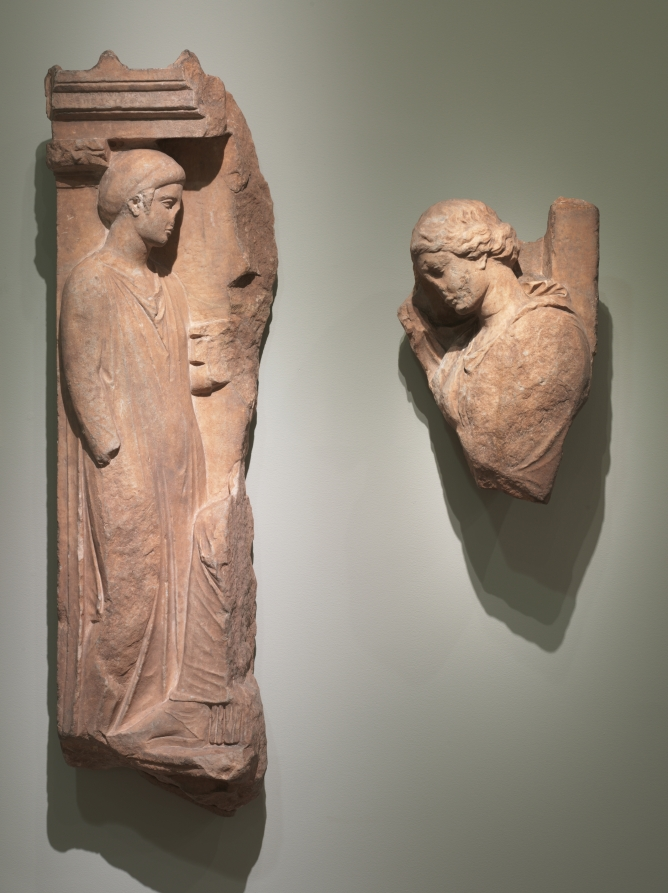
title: Grave Stele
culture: Greece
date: 400–350 BCE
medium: pentelic marble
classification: Sculpture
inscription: ...ΜΕΓΑΛΗΝ ΛΥΠΗΝ ΣΥ ΛΙΠΟΣΑ ΦΑΝ... ...ΔΕ ΣΕΠΩΙΚΤΙΣΕ ΜΟΙΡΑ ΠΟΘΕΙ...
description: Carved in high relief, the original composition of this Attic grave marker can be reconstructed by comparison with more complete examples elsewhere (such as the Stele of Hegeso in Athens [National Archaeological Museum, 3624]). The standing figure at left likely represents a maid or servant, her hair mostly contained within a sakkos (haircloth). Holding a pyxis (small container) in her left hand, she approaches the more fragmentary seated figure at right. This woman, draped and casting her eyes downward, represents the deceased, perhaps Phanostrate, as one scholar has restored the partial name Phan... inscribed in the fragmentary epigram on the preserved portion of the lintel.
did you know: The fragmentary seated woman at right represents the deceased.